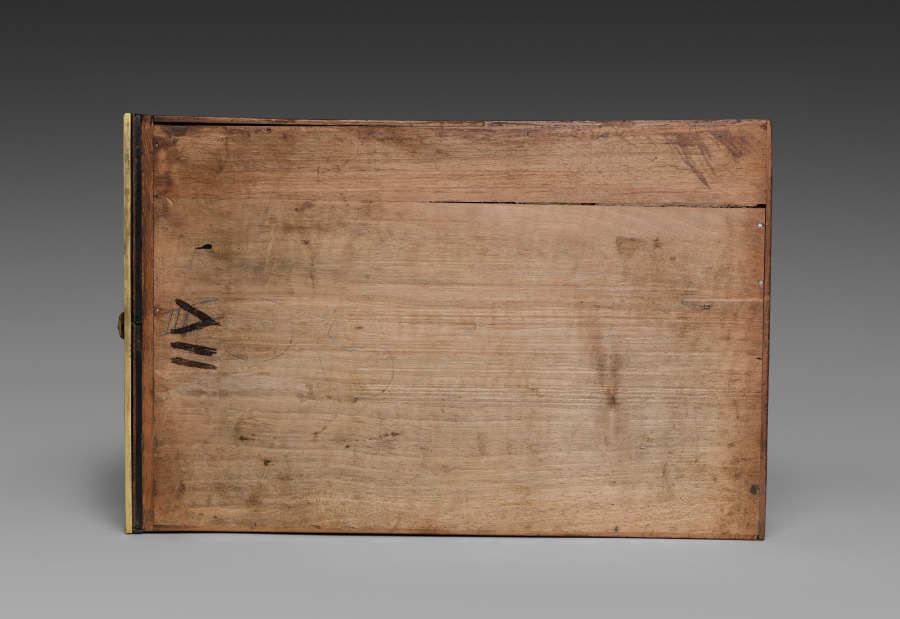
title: Side Drawer for Cabinet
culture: France, late 17th Century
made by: André-Charles Boulle (French, 1642–1732)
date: c. 1690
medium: ebony, marquetry in metal and tortoise shell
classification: Furniture and woodwork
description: Appointed cabinetmaker to King Louis XIV in 1672, André-Charles Boulle became a master of furniture making in France during the late 1600s until his death in 1732. Known primarily for his use of marquetry, in which metal patterns are inlaid into tortoiseshell then applied within the veneered surface of the furniture, Boulle established a level of quality and craftsmanship few others could achieve. As a result, his work found favor at the royal court and among other aristocrats and diplomats eager to impress the king. The inclusion of a medallion depicting Louis XIV within the bronze decoration of this chest would have identified the owner with the royal court. Often exhibiting stout architectural proportions with elegant groups of inlaid motifs such as the parrot on the central panel of this chest, Boulle’s designs are an example of the intellectual fashion for contrasting ideas, materials, and motifs.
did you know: Originally designed to sit atop an elaborate tall stand, this chest was likely altered in the late 1700s to reduce its scale and height.